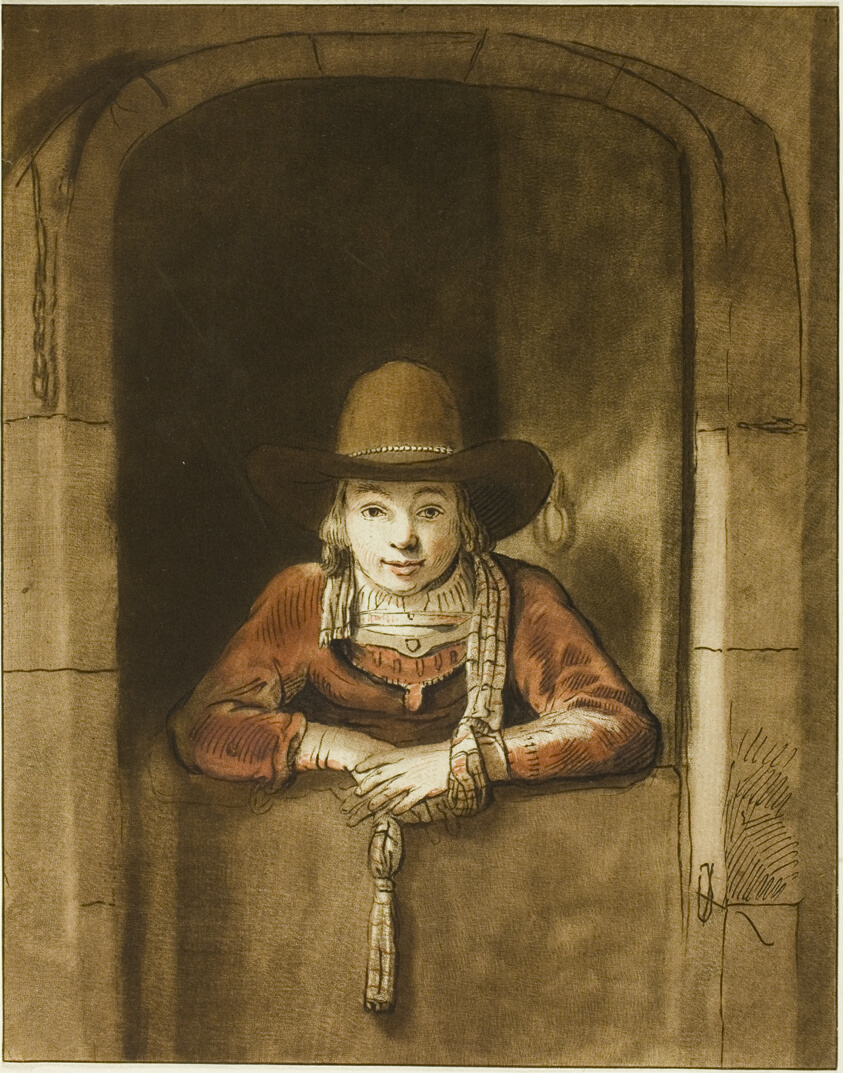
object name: Print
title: Ein Jungling (Titus)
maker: Jacob Cornelis Ploos van Amstel (Dutch, 1726-1798); after Rembrandt van Rijn (Dutch, 1606-1669)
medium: Hand-colored etching in brown on paper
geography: Netherlands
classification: etching; print; prints and drawing